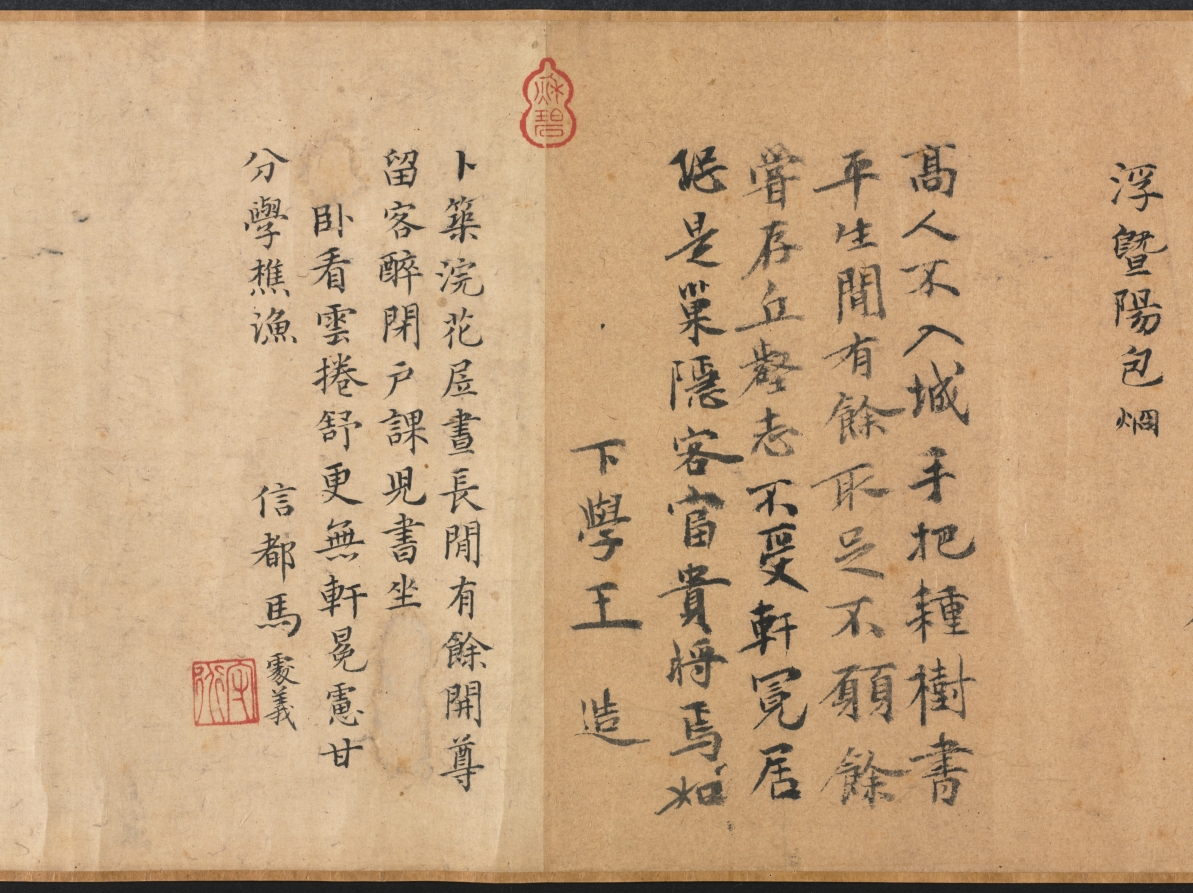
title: Leisure Enough to Spare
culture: China, Yuan dynasty (1271-1368)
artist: Yao Tingmei (Chinese, active mid-1300s)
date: 1360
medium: handscroll, ink on paper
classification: Painting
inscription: 至正廿年春正月_日作此併系鄙語于尾 地偏人遠閉柴關，滿院松陰白晝閒。 眼底風塵渾忘却，坐看流水臥看山。 吳興姚廷美畫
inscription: 23 colophons and 53 seals (dates unavailable for some): 1 colophon, dated 1360, and 2 seals of Yang Weizhen (1296-1370); 1 colophon and 3 seals of Wan Yi; 1 colophon of Zhang Junde; 1 colophon and 3 seals of Angji (act. ca. mid-14th c.); 1 colophon and 1 seal of Xu Shiquan; 1 colophon and 3 seals of Gao Yu; 1 colophon and 2 seals of Li Mingfu; 1 colophon and 2 seals of Lu Lin; 1 colophon and 1 seal of Zhang Qian; 1 colophon of Tao Tangwen; 1 colophon and 1 seal of Wu Yuangui (act. ca. 1300-60); 1 colophon of Bao Jiong; 1 colophon of Wang Zao; 1 colophon and 1 seal of Ma Chuyi; 1 colophon and 1 seal of Lin Yizhuang; 1 colophon and 1 seal of Gu Shunju; 1 colophon and 2 seals of Wang Jing; 1 colophon and 2 seals of Lin Shouchang; 1 colophon and 1 seal of Gao Zhidao; 1 colophon of Lin Xun; 1 colophon, dated 1359, and 2 seals of Meng Weicheng (act. mid-14th c.); 1 colophon and 1 seal of Meng Zhiji (act. mid-l4th c.); 14 seals of Liang Qingbiao 梁清標 (1620-1691); 1 poem dated 1755 and 5 seals of the Qianlong 乾隆 emperor (r. 1736-95); 2 seals of the Jiaqing 嘉慶 emperor (r. 1796-1821); 3 seals of the Xuantong 宣統 emperor (r. 1909-11).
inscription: Title on frontispiece by Zhang Bi 章弼: Signed Gongchen 拱辰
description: Seclusion and leisure—the ideals of the literati, or scholar-gentlemen—are expressed in this mature work by Yao Tingmei. The theme acquired special meaning at a time of the military uprisings near the end of the Yuan dynasty. Dedicated to an ascetic named Du, this work combines painting, calligraphy, and poetry; following the painting are more than 20 poems and essays written by notable scholars, one of whom was the calligrapher Yang Weizhen. It reveals not only the aesthetic taste of the literati but also the practice of contributing artistic and literary works to fulfill social obligations. Yao's painting demonstrates his individual style derived from various ancient masters (Guo Xi, Dong Yuan, and Juran). Yang Weizhen's calligraphy exhibits his bold, vigorous style and his intent to capture the spirit of antiquity in art.